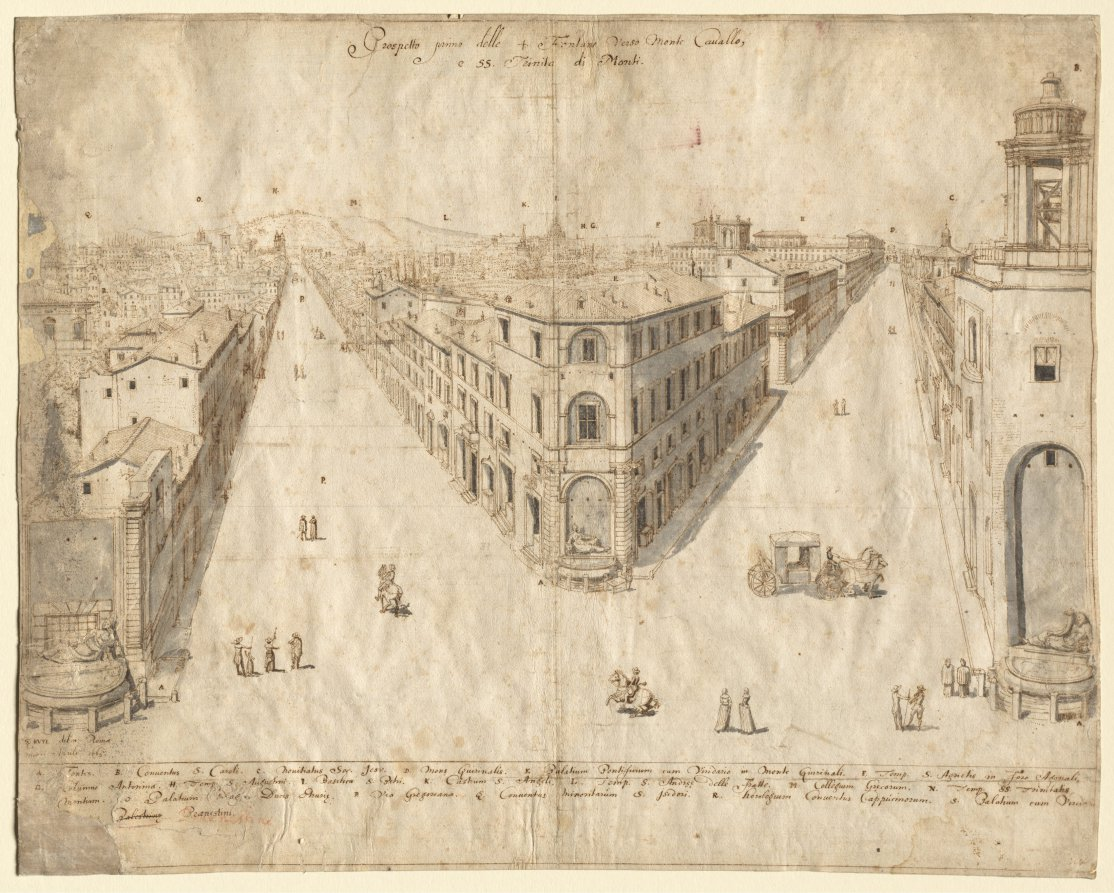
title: Eighteen Views of Rome: The Quattro Fontane Looking Toward Monte Cavallo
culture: Flanders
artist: Lievin Cruyl (Flemish, c. 1640-c. 1720)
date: 1665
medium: pen and brown ink and brush and gray wash over graphite; framing lines in brown ink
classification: Drawing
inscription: signed, lower left, in brown ink: [artist's monogram: LC] RVYL delin: Romæ / mense Aprili 1665. ; by artist, upper center, in brown ink: Prospetto primo delle 4. Fontane Verso Monte Cavallo, / e SS. Trinita di Monti ; by artist, throughout composition, in brown ink: [the letters A-R] ; by artist, across bottom, in brown ink: A. Fontes. B. Conventus S. Caroli. C. Novitiatus Soc. Jesv. D. Mons Quirnalis. E. Palatium Pontificium cum Viridario in Monte Quirinali. F. Temp. S. Agnetis in Foso Agonali. / G. Columna Antonina. H. Temp. S. Augustini. I. Basilica S. Petri. K. Castrum. S. Angeli. L. Temp. S. Andreæ delle Fratte. M. Collegium Grecorum. N. Temp. SS. Trinitatis / Montium. O. Palatium Mag[ni] Ducis Etruriæ. P. Via Gregoriana. Q. Conventus Minoritariúm S. Isidori. R. Horologium Conventus Cappúcinorum. S. Palatium cum Virida[r]io / [portion missing] Palestrinæ[crossed out] Praenestini [in red chalk] Prænestini. [in brown ink, rewitten over inscription in red chalk] ; ON STRIPS OF PAPER MOUNTED TO VERSO, bottom center, in graphite: A20983 ; lower right, in graphite: E. 20 ; ON PIECE OF PAPER APPLIED TO VERSO AS A REPAIR, lower right, in graphite: [four lines of illegible inscription] [upside down]